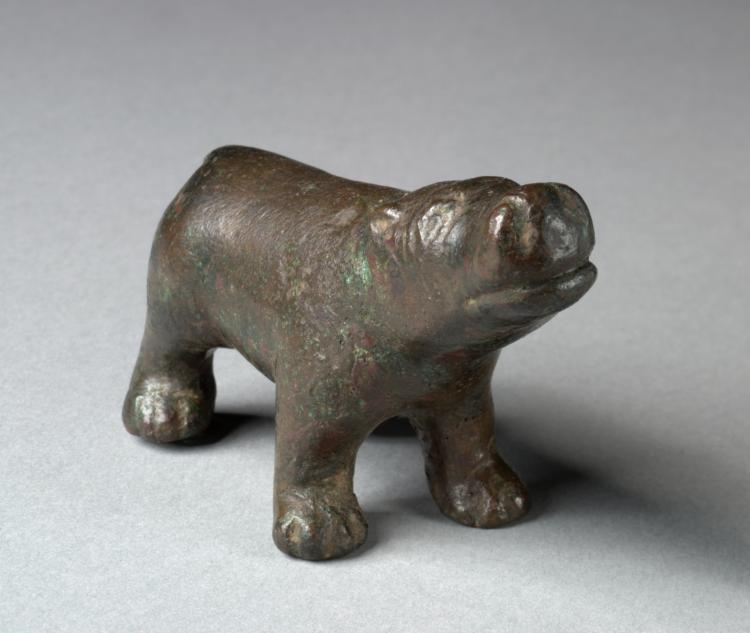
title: Hippopotamus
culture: Italy, Rome, Greco-Roman Period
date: 332 BCE–395 CE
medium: bronze, solid cast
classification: Sculpture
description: This hippopotamus steps forward with its rear left leg lifted off the ground and its head arched upwards. The hippopotamus was a Nilotic animal associated with Egypt and the Nile River that was brought to Rome and put on display in the Colosseum as part of venationes, or wild beast hunts. The rise of “Egyptomania” in the Roman Empire surged under the emperor Hadrian (reigned AD 117–38). Extant Egyptian examples of hippopotamus figurines are less animated and made of materials such as stone or pottery rather than bronze, making the pose and materiality of this object distinctly Greco-Roman.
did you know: The word hippopotamus is a Greek compound word combining “horse” (hippos) and “river” (potamos).